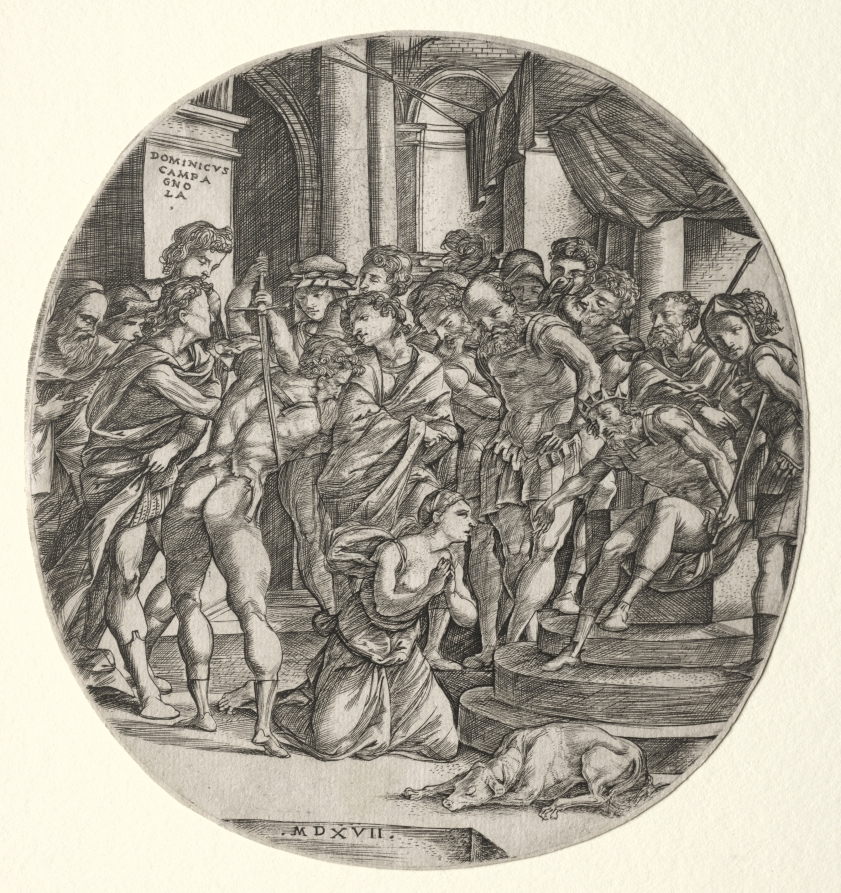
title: Beheading of Saint Catherine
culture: Italy, 16th century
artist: Domenico Campagnola (Italian, 1500–1564)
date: 1517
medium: engraving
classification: Print